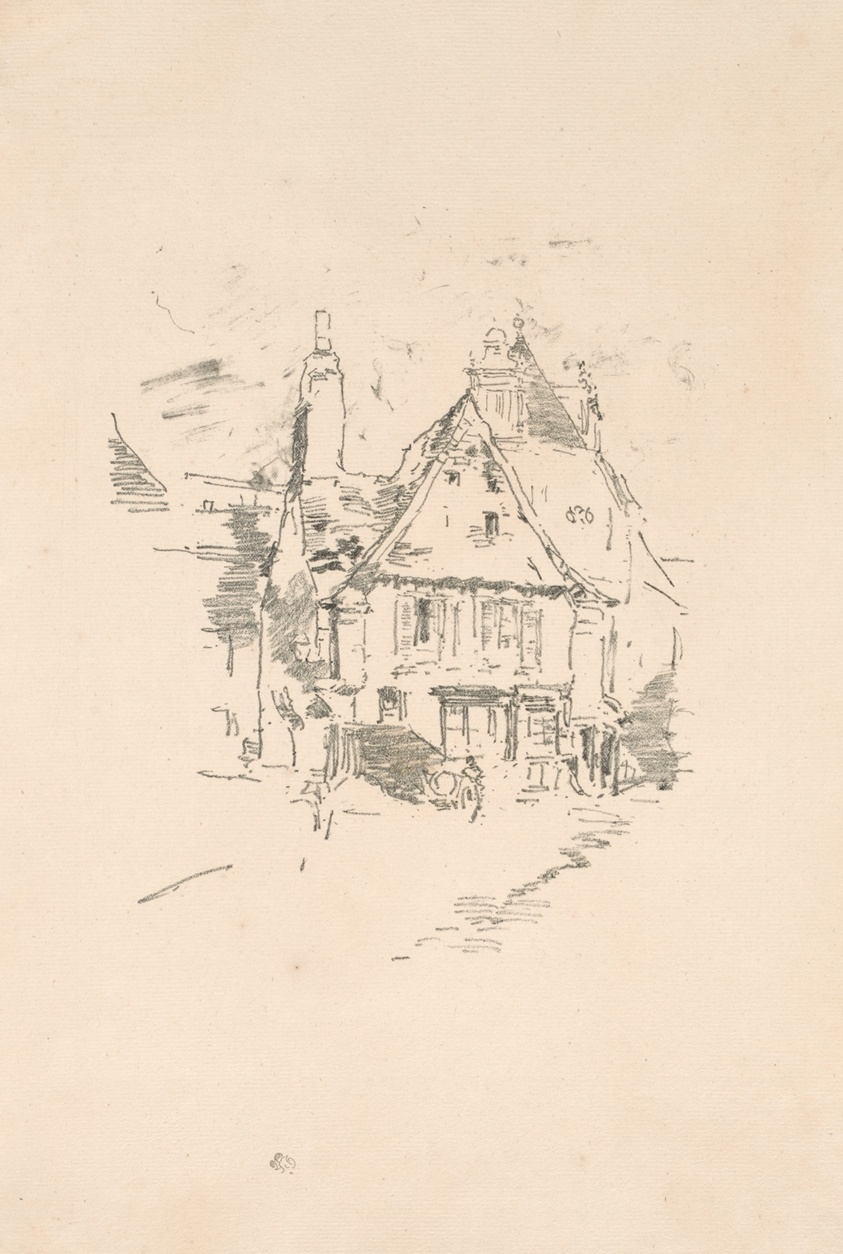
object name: Print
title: Gabled Roofs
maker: James McNeill Whistler (American, 1834-1903)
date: 1893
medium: Transfer lithograph in black with stumping, on cream laid paper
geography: United States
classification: transfer lithograph; lithograph; print; prints and drawing; paper